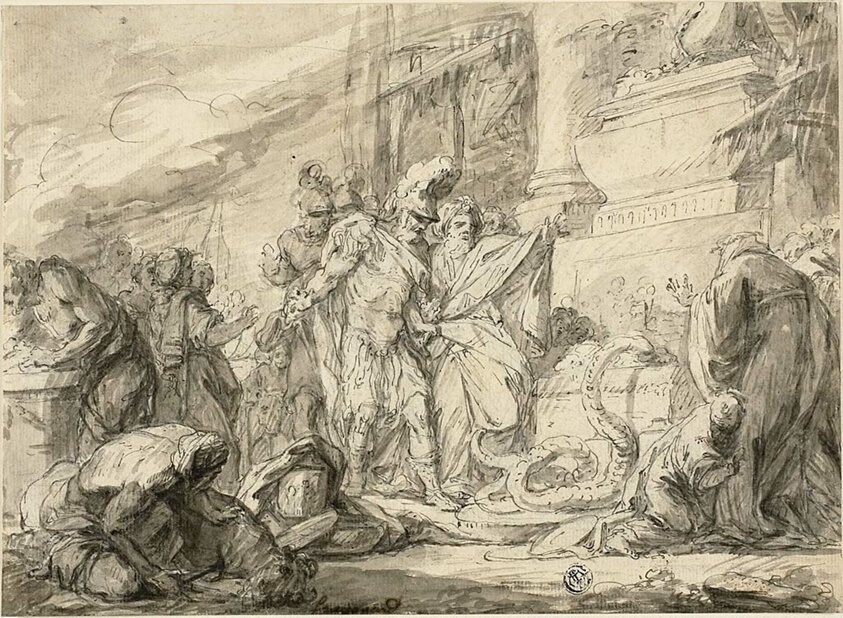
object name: Drawing and Watercolor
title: Aeneas at the Tomb of Anchises (recto); Aeneas at the Tome of Anchises (verso)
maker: Attributed to Nicolas Bernard Lépicié; French, 1735-1784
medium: Pen and gray-brown ink, with brush and gray wash, over traces of graphite (recto), and black chalk (verso), on ivory laid paper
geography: France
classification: ink or chalk wash; drawings (visual works); prints and drawing